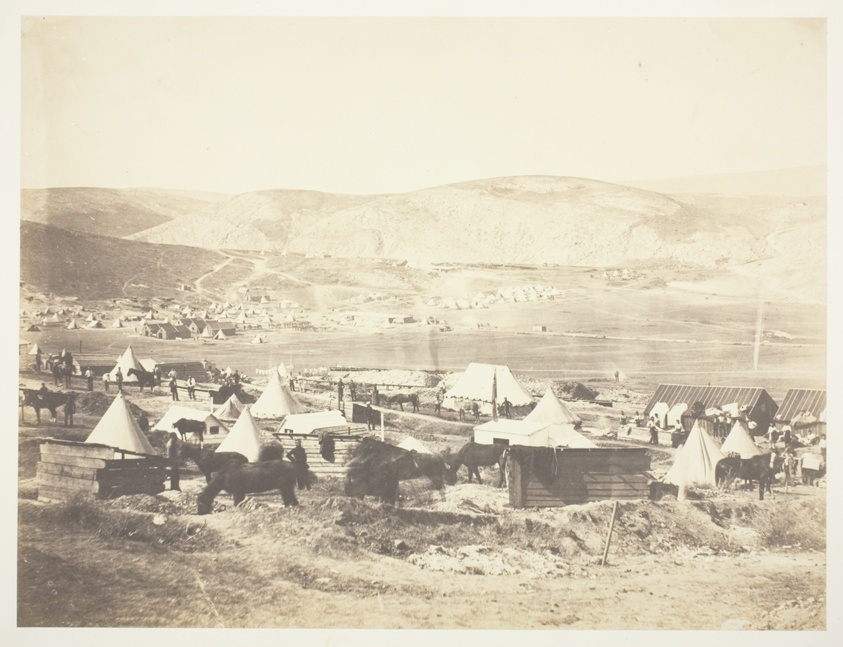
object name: Photograph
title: Camp of the 5th Dragoon Guards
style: 19th century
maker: Roger Fenton (English, 1819–1869)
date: 1855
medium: Salted paper print, from the album "Photographic Pictures of the Seat of War in the Crimea" (1856)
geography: England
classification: salted paper print; photographic process; photography; photograph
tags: Collected by Hugh Edwards